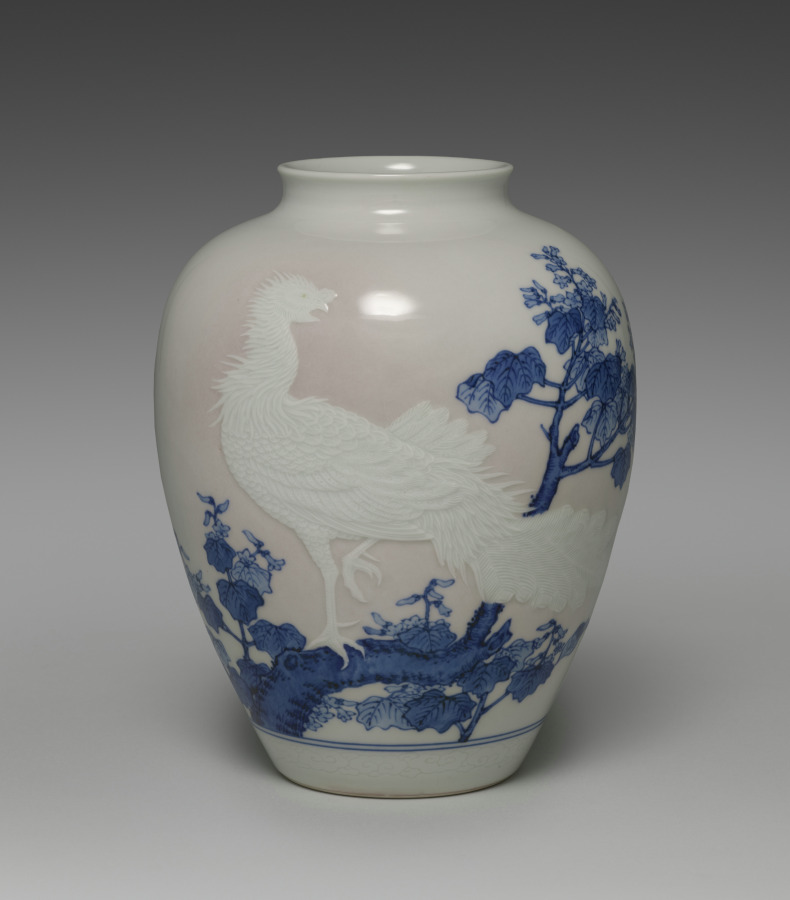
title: Flower Vase with Phoenix in Paulownia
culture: Japan, Meiji period (1868–1912)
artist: Seifū Yohei III (Japanese, 1851–1914)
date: 1897–1914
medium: Porcelain with molded and carved design and underglaze color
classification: Ceramic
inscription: 清風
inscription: 清風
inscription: 清風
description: The phoenix’s commanding presence on this vase was created by adding clay to the surface of the white clay body and then intricately molding and carving it. Then cobalt blue was used to paint the paulownia tree upon which the phoenix perches. Yohei III used a masking technique, covering the phoenix with paper before adding pink color to the area surrounding it. Firing with an allover transparent glaze created a glossy surface, with the phoenix standing out boldly from the background. The mythical bird’s long tail sweeps majestically around the vessel so that one must move around it to see the eyespots in its plumes. A symbol of imperial power in both China and Japan, the phoenix is said to alight only in the paulownia tree. Upon close inspection of its face, one can see that the phoenix’s eye is in yellow under the glaze. The scene is set off at the bottom with a double band of underglaze blue above an incised ring of cloud. Once Yohei III had created his creamy translucent taihakuji glaze, he began applying it over the entire surface of an ivory clay body with motifs in low relief to achieve a creamy white-on-white design. He then began using the combination of gradated pink around raised motifs on a typical white porcelain clay body like the one for this vase. He masked his low-relief designs with paper before sprinkling diluted iron oxide glaze onto the surrounding areas through a net with a brush. These unpigmented elements stand out as starkly white against the gentle pink blush color that surrounds them. Still later, he added pink to the translucent creamy glaze he used in kanpakuji works and used it over motifs in relief on an ivory clay body for an overall pink-tinged cream effect (see CMA 2022.198).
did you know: In 1893, Seifū Yohei III became the first ceramist to be appointed as an Imperial Household Artist under a system introduced by the Japanese government in 1890.